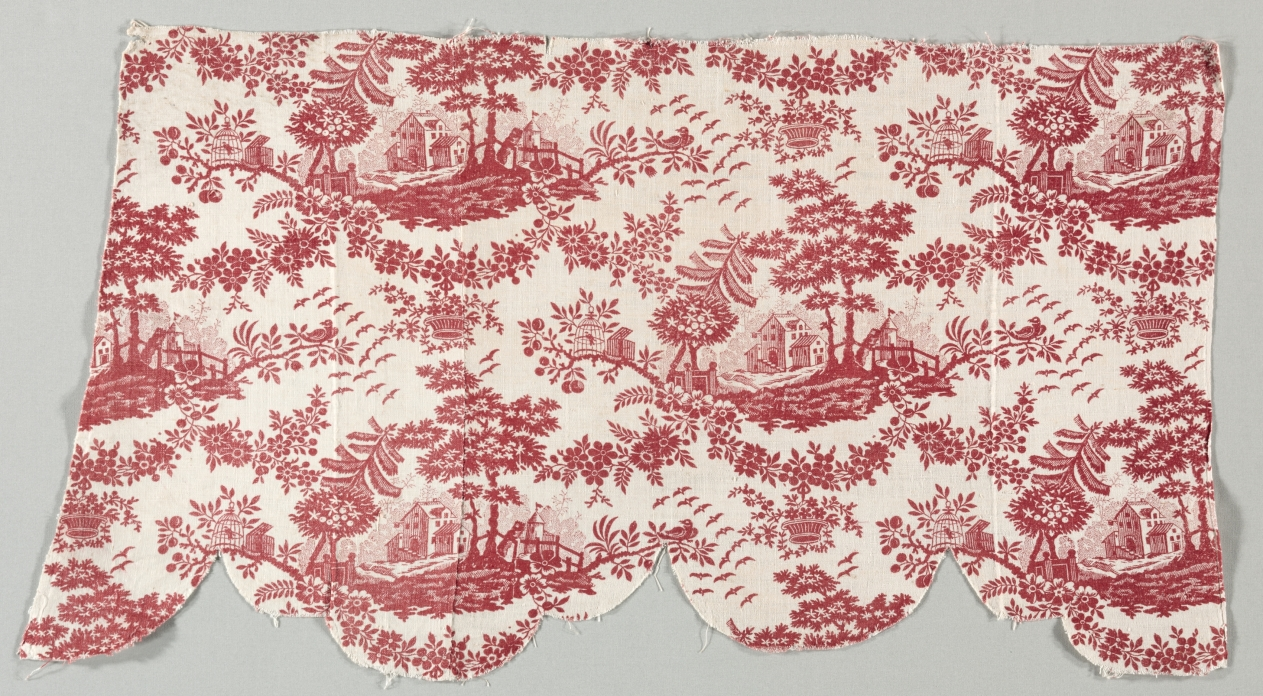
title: Fragment of Woodblock Print on Cotton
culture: France, 18th century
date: c. 1770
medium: woodblock print on cotton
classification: Textile